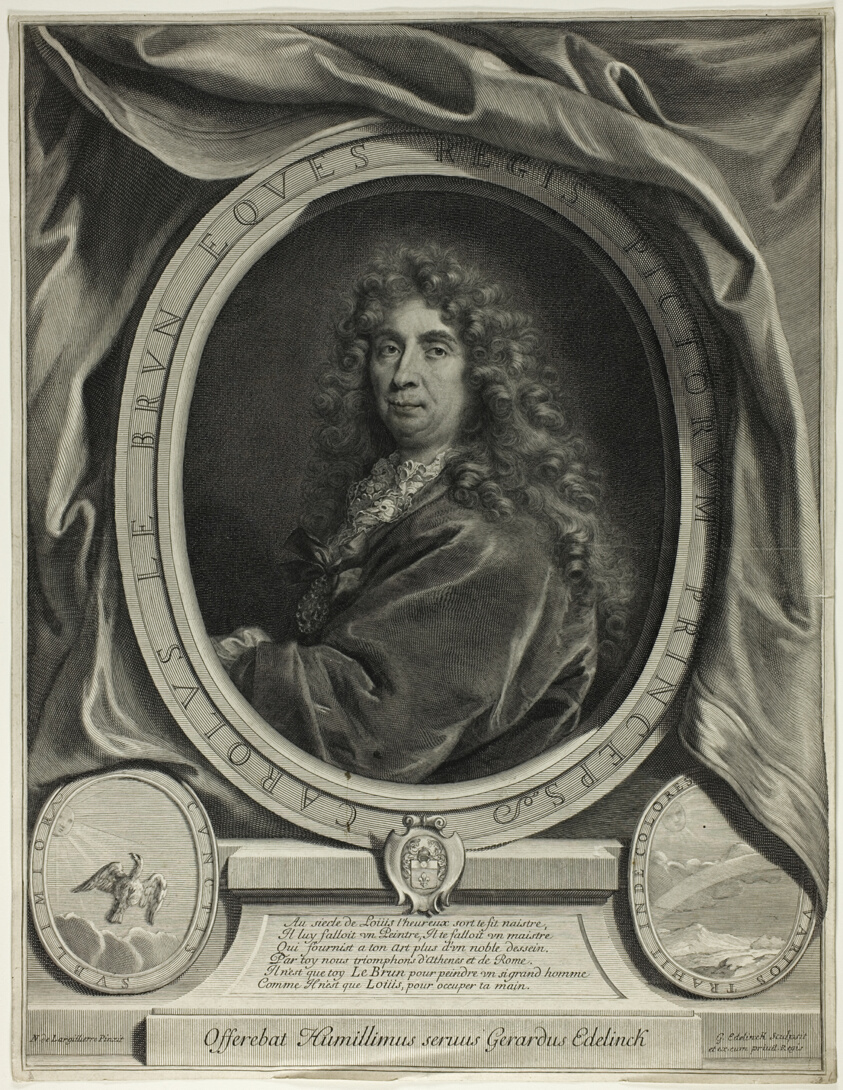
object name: Print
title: Charles le Brun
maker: Gérard Edelinck (French, born Flanders, 1640-1707); after Nicolas de Largillière (French, 1656-1746)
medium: Engraving on ivory laid paper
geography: France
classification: engraving; print; prints and drawing